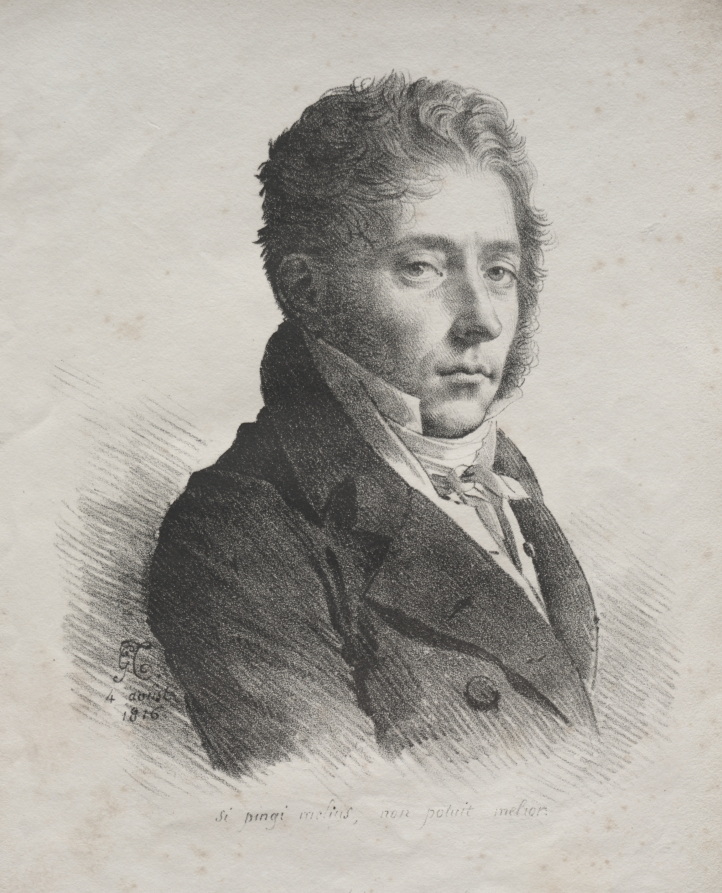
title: Receuil d'essais lithographiques: Portrait of M. Coupin de La Couperie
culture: France, 19th century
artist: Anne-Louis Girodet de Roucy-Trioson (French, 1767–1824)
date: 1816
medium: lithograph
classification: Bound Volume